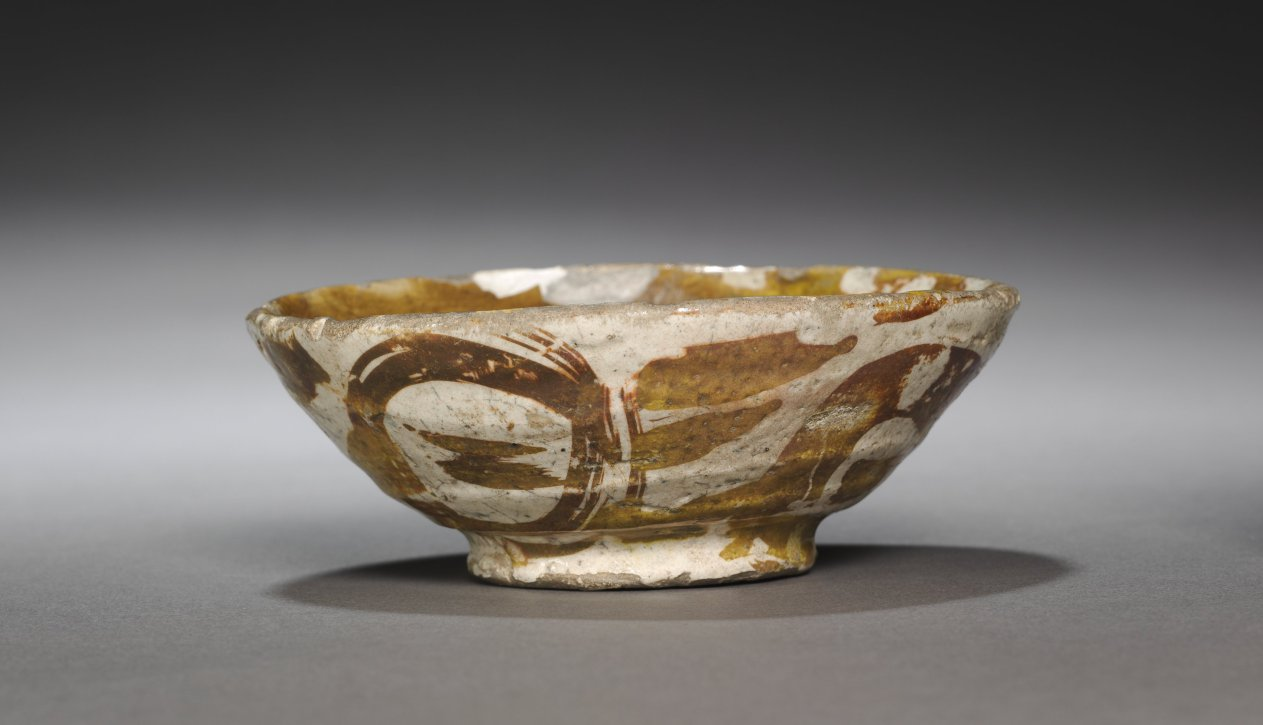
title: Bowl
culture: Fatimid Egypt, Fustat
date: 1000s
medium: earthenware with luster-painted design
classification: Ceramic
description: Lusterware The theme of light is a dominant element in Islamic art. In ceramics, works made with a reflective metallic glaze, known as luster, were prized throughout the Islamic world and beyond. Developed first in Basra, Iraq, during the 700s with the rise of Islam along with sumptuary laws prohibiting the use of precious metal vessels, lusterware techniques soon spread to different regional centers, notably Málaga and Valencia in Spain. Lusterware ceramics were created through a double-firing process: the first firing of the vessel with a lead and tin oxide glaze produced the smooth white ground, meant to emulate Chinese porcelain. Patterns were then painted on the white vessel with a glaze of copper and other metal oxides. Refiring at a low temperature yielded an iridescent luster. Tonalities varied from one region to another.